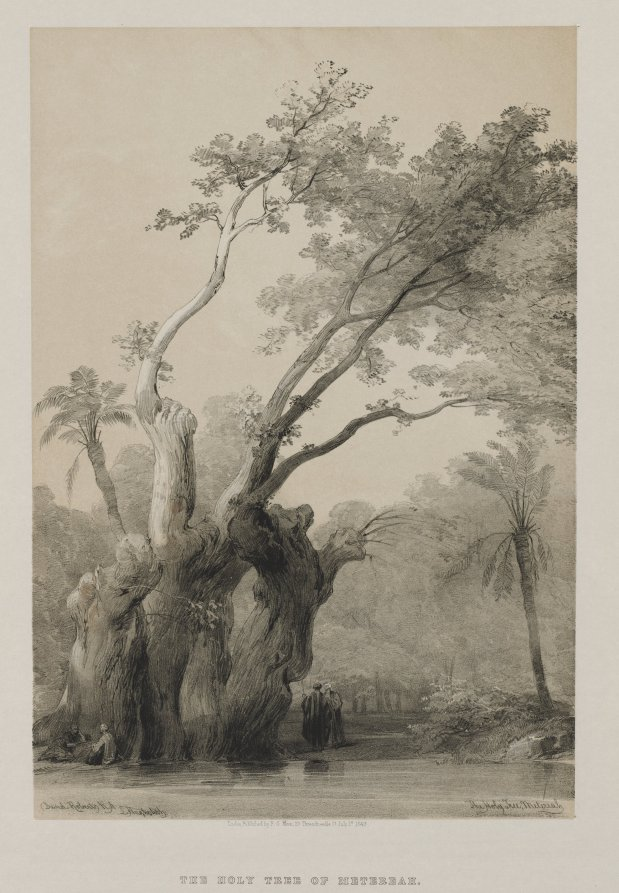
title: Egypt and Nubia, Volume III: The Holy Tree of Metereah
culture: England, 19th century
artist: Louis Haghe (British, 1806–1885)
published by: F. G. Moon, 20 Threadneedle Street, London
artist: after David Roberts (Scottish, 1796–1864)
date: 1849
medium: color lithograph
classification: Print